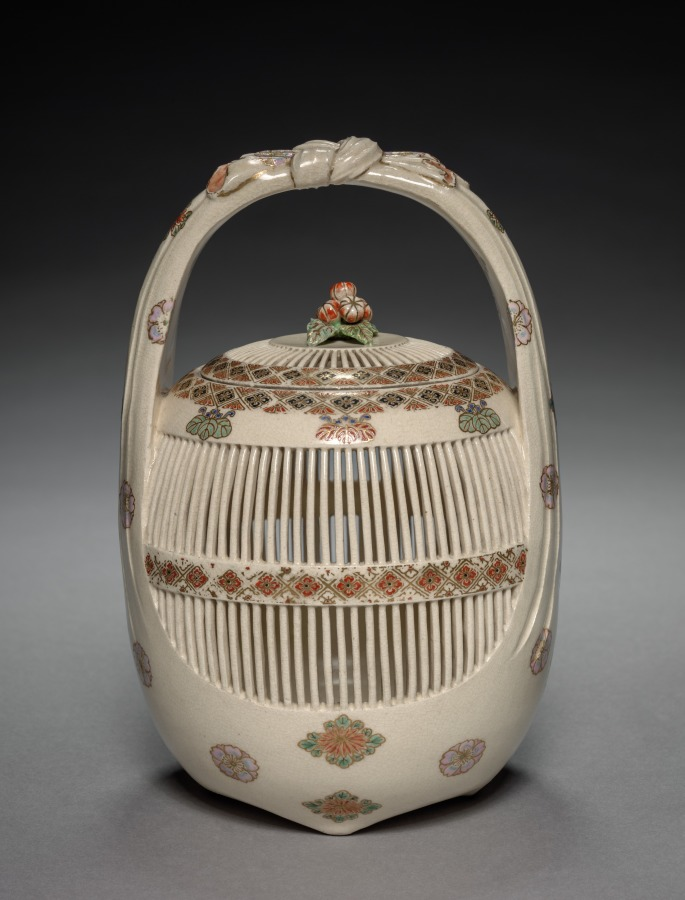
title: Jar: Satsuma Ware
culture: Japan, Edo period (1615–1868)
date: early to mid-1800s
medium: pottery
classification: Ceramic